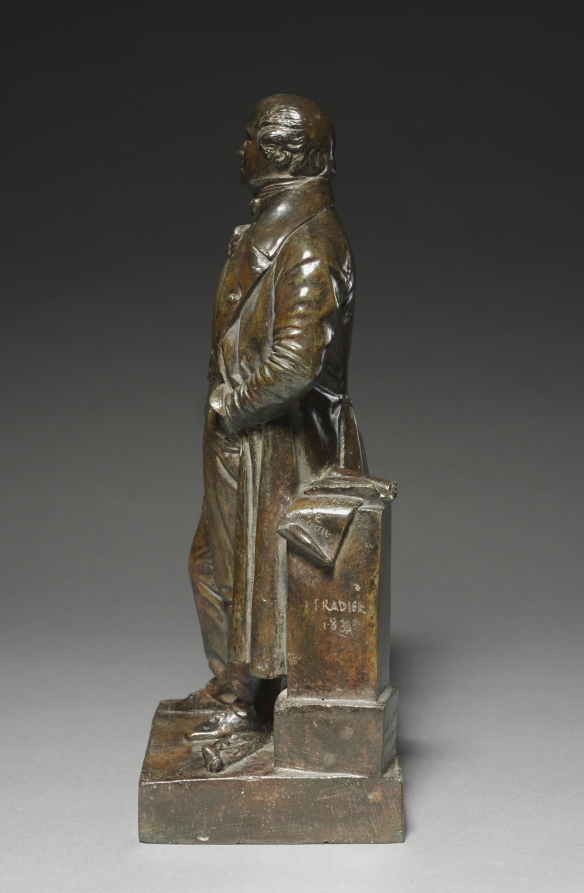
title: Portrait of Jean-Pierre-Joseph Darcet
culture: France, 19th century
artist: James Pradier (Swiss, 1790–1852)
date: 1834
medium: bronze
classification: Sculpture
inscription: signed an dated: "J. Pradier/ 1834"